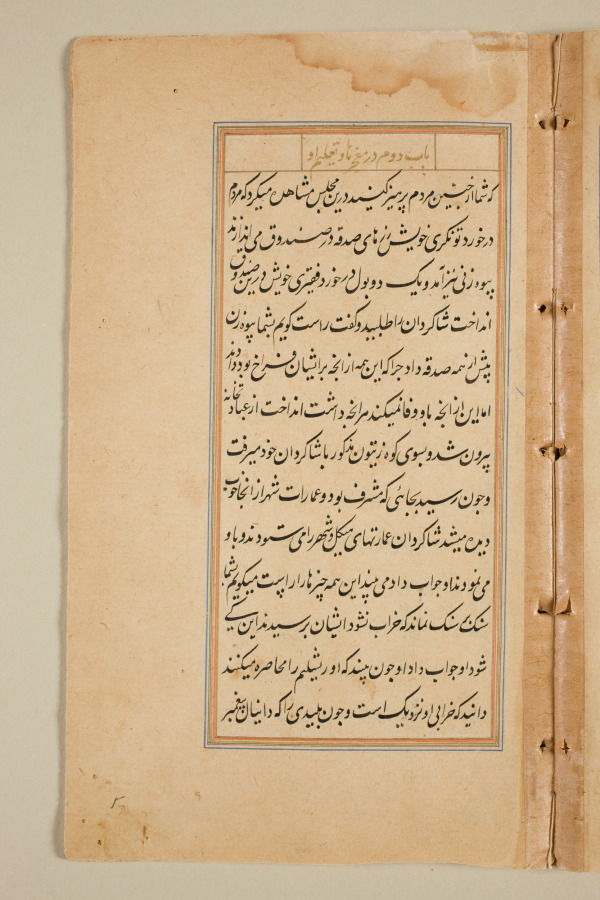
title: Text page from a Mirror of Holiness (Mir’at al-quds) of Father Jerome Xavier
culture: Mughal India, Allahabad, made for Prince Salim (1569–1627)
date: 1602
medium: Ink and gold on paper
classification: Manuscript